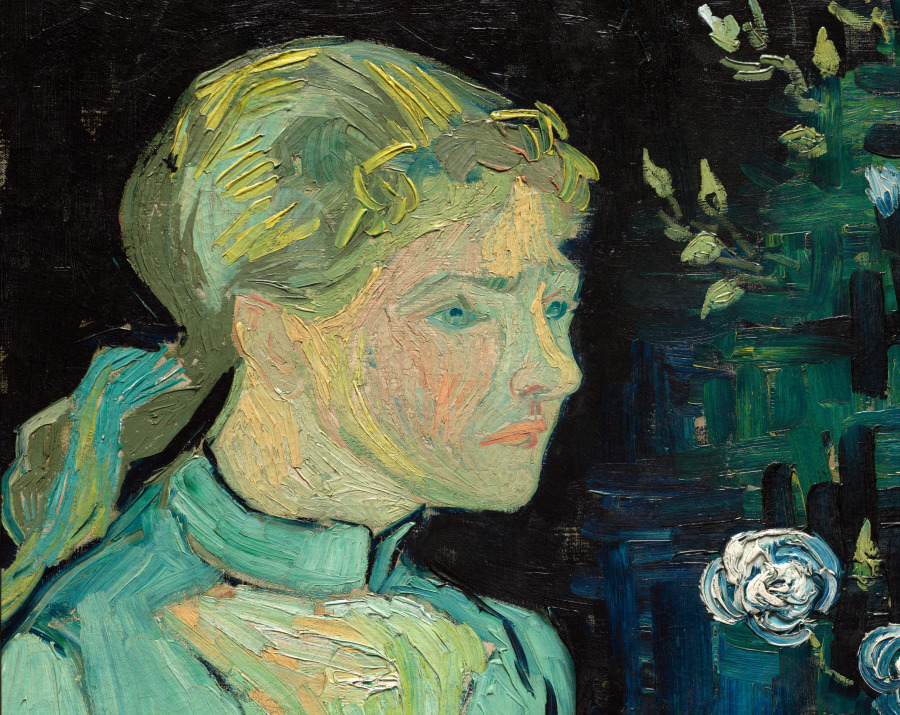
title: Adeline Ravoux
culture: Netherlands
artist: Vincent van Gogh (Dutch, 1853–1890)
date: 1890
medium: oil on fabric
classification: Painting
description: In May 1890, Vincent van Gogh arrived in Auvers, a small town north of Paris, where he rented a room at the inn of Arthur Ravoux. This portrait, completed during the last months of the artist’s life, depicts Ravoux’s 13-year-old daughter, Adeline. Van Gogh wrote that rather than photographic resemblance, he wanted his portraits to convey the “impassioned aspects” of contemporary life through the “modern taste for color.”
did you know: Adeline Ravoux, at age 13, was not pleased with her portrait and did not think the image resembled her. Today, a photograph exists of Adeline in her late seventies and the resemblance is truly remarkable.